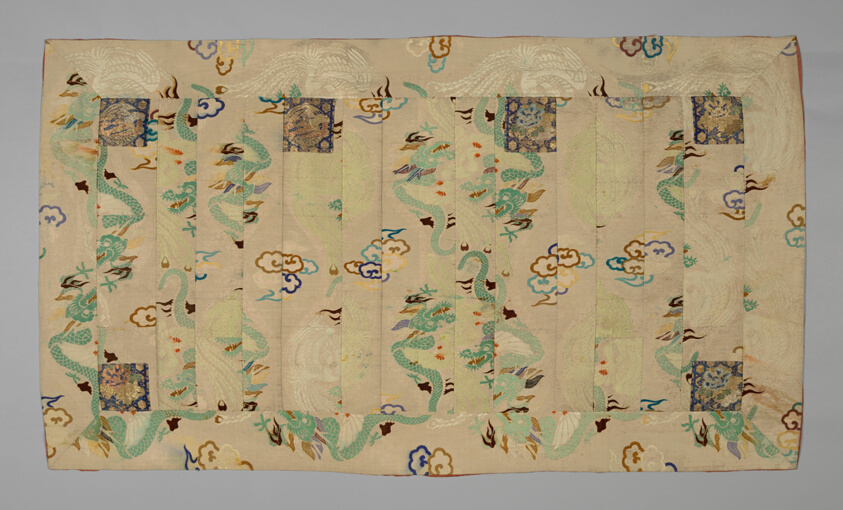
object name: Textile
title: Kesa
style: meiji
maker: Japan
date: Meiji period (1868–1912), 1870/90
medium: Heri, yô, jô: silk and gold-leaf-over-lacquered-paper-strip, warp-float face 2:1 ‘Z’ twill weave with weft-float faced 1:2 ‘S’ twill interlacings of secondary binding warps and supplementary patterning wefts; lined with silk, plain weave; shiten and niten: silk, cotton and gold-leaf-over-lacquered-paper-strip, warp-float faced 2:1 ‘Z’ twill weave with supplementary brocading weft floats and patterning wefts bound in weft-float faced 1:2 ‘S’ twill interlacings; lining: silk, plain weave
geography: Japan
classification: textile; liturgical - buddhist; weaving